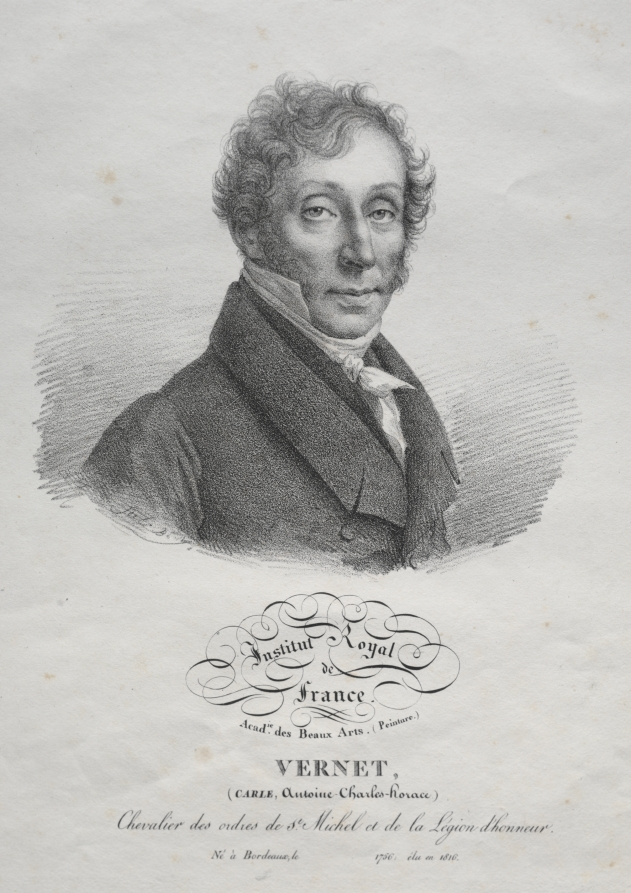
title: Carl Vernet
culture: France, 19th century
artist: Julien Léopold Boilly (French, 1796–1874)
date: c. 1825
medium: lithograph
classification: Print